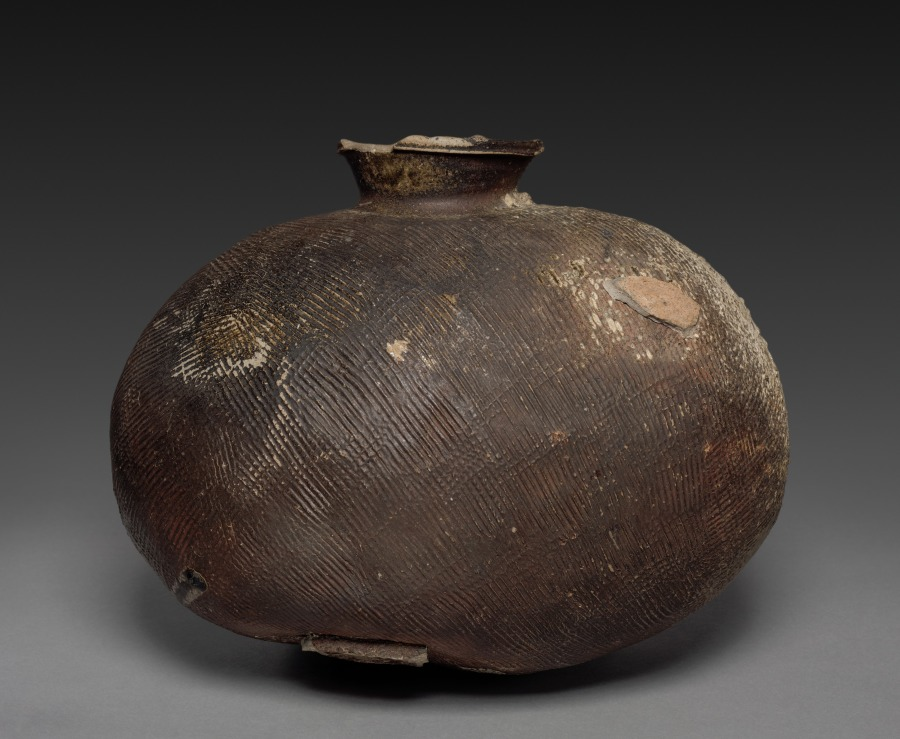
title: Jug with Oblong Body: Sueki Ware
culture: Japan, Nara period (710–94)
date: 700s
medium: stoneware, with impressed decoration and natural ash glaze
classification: Ceramic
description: The unusual shape of this sturdy vessel derives from two deep bowl forms being joined together at their mouths. An opening was then cut out where the separately formed neck and mouth were attached. This vessel shape came to early Japan from Korea, as did the paddled surface decoration technique.The jug's rich surface tonalities were created by wood ash in the kiln chamber that settled on the vessel during firing. The mottled gray areas indicate where large accumulations of ash adhered to the hot body. The darker, green skin that appears shiny or reflective represents generous ash accumulations that vitrified, becoming a natural green glaze. In one area this accumulation is so rich that it formed rivulets of glassy green glaze, propelled across the black matte surface by the fiery winds coursing within the kiln.